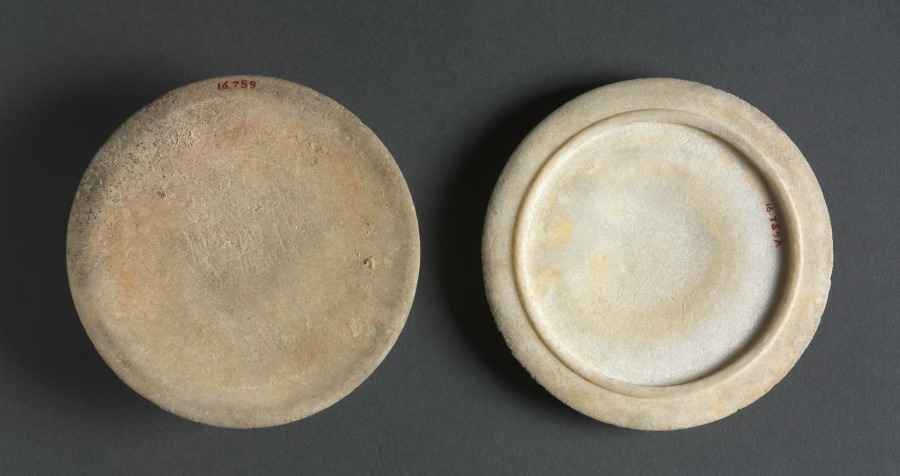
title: Pyxis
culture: Greece, Attic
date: 400–300 BCE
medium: marble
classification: Stone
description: Pyxides came in a huge variety of sizes, shapes, and materials in the ancient world. Images of pyxides in Greek art often show them being used by women, which has led scholars to believe that they may have been used to hold jewelry or cosmetics. This pyxis is one of few surviving examples made from stone, signifying that it may have had an elite owner.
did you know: This vessel has a threaded lid, like a modern mason jar, allowing it to be tightly sealed.